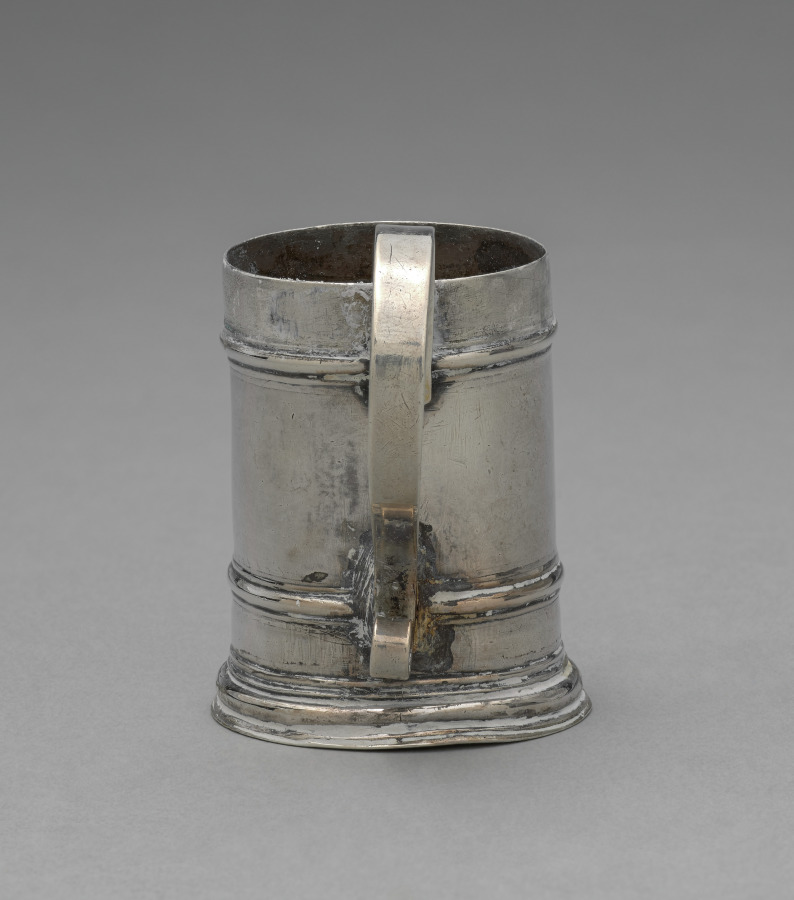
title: Caster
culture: America, Massachusetts, Boston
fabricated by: John Edwards (British)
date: c. 1715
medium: silver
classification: Silver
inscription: engraved "C" over "EE" in shaded block letters on bottom, and "FLB" (later) in bright-cut script on front, opposite handle.